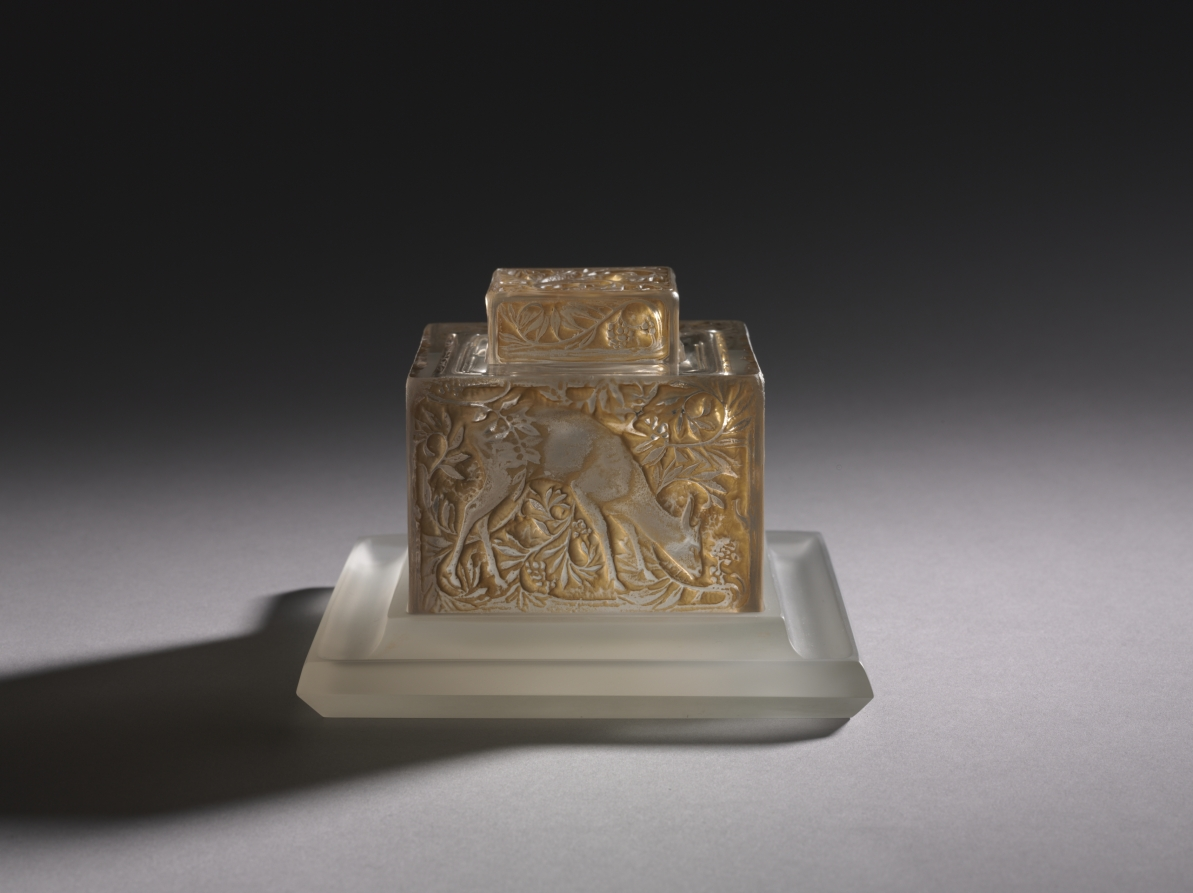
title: Deer Inkwell (Encrier biches)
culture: France, 20th century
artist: René Lalique (French, 1860–1945)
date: c. 1913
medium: clear glass with brown patina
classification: Glass